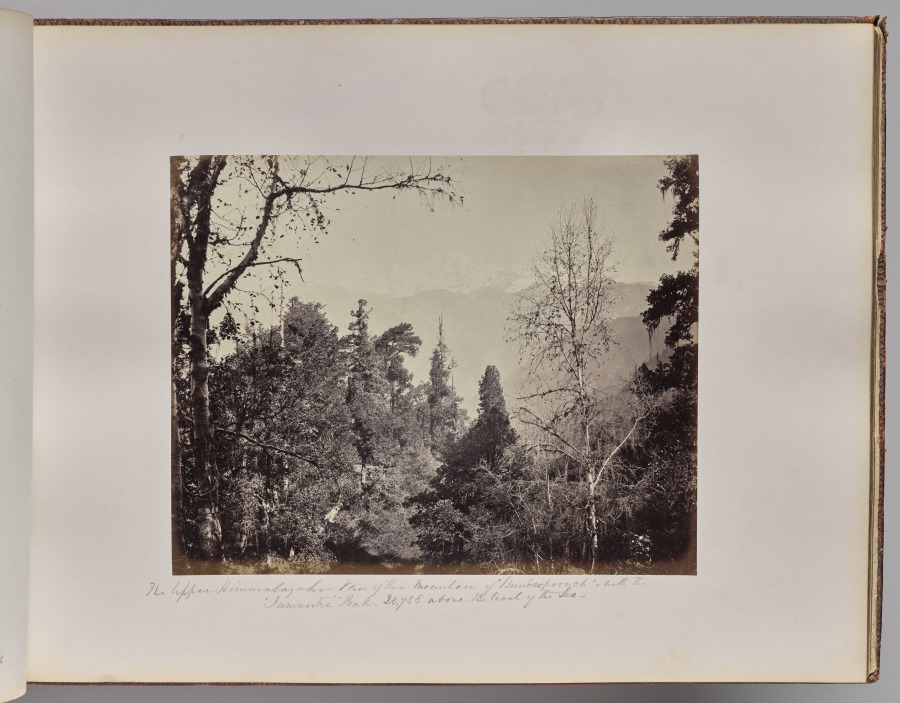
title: The Upper Himmalayahs. View of the Mountain of Bunderpoonch with the Jumnootri Peak, 20,458 above the Level of the Sea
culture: England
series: Photographs of Northern India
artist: Samuel Bourne (British, 1834–1912)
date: 1863–70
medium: albumen print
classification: Photograph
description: The 50 images in this album, all taken in the 1860s, move from the hill towns of the Himalayas down to cities including Lahore (now in Pakistan), Delhi, Lucknow, Agra, Benares (now Varansi), and Calcutta (now Kolkata). Architectural studies of major monuments offer valuable historical records of what sites such as the Taj Mahal and the imperial mosque of the Mughal emperors in Delhi looked like before twentieth-century restorations.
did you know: Samuel Bourne, the author of most the images in this album, was a banker in England before he moved to India to become a professional photographer.